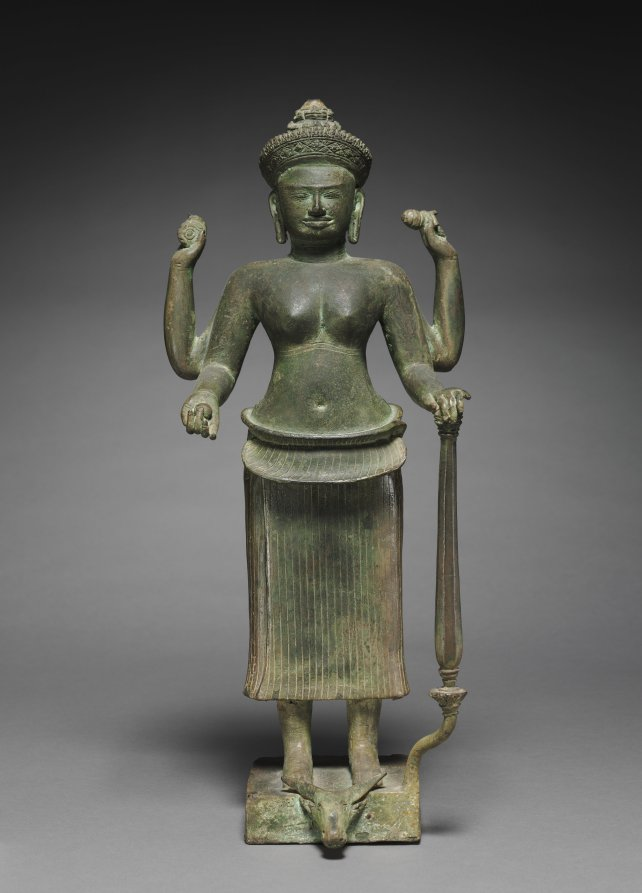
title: Durga as the Slayer of the Buffalo Demon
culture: Cambodia, probably Koh Ker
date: 900s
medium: bronze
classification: Sculpture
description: This depiction of Durga is rare and important, as it is a large-scale example of the goddess in bronze. Her conquest over the buffalo demon is indicated by its severed head at her feet. She stands four-armed and triumphant, with a wheel, conch shell, mace, and clod of earth in her hands.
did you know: The figure wears a head-dress, kirita-makuta, a diadem tied in the back and pointed at top.